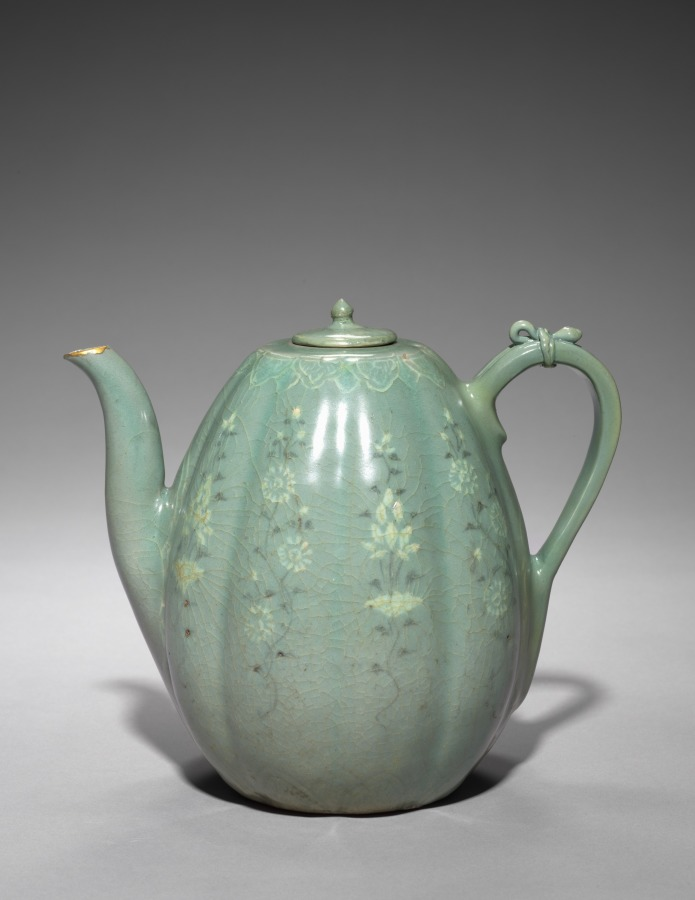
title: Melon-shaped Ewer with Incised Peony Design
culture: Korea, Goryeo dynasty (918–1392)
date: 1200s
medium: pottery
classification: Ceramic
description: This melon-shaped pitcher is adorned with a delicate drawing that renders chrysanthemum buds with full blossoms in white and black inlays. In Korea, chrysanthemum flowers and leaves were made into both tea and wine. Chrysanthemum wine was enjoyed during the the Double Nine Festival (the ninth day of the ninth month in the lunar calendar) when praying for longevity.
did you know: The shape of this pitcher resembles a type of yellow muskmelon cultivated mainly in East Asia.